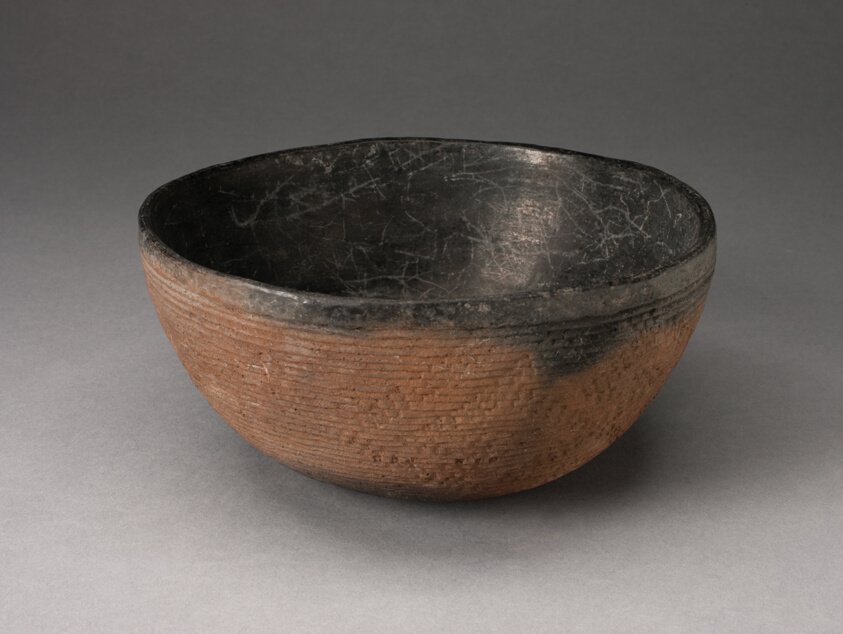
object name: Vessel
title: Bowl with Textured Surface Decoration in Basketry-Like Pattern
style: ancestral pueblo (anasazi), anasazi, Pre-Columbian, americas, southwest, Arts of the Americas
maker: Possibly Ancestral Pueblo (Anasazi); Southwest, United States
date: 900–1000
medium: Ceramic and pigment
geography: New Mexico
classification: earthenware; ceramics; vessel; art of the americas